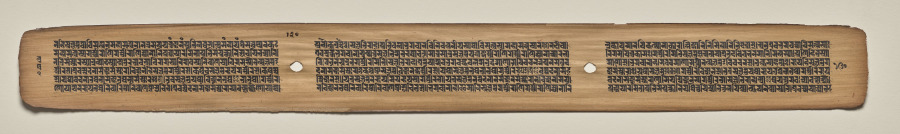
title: Text, Folio 120 (verso), from a Manuscript of the Perfection of Wisdom in Eight Thousand Lines (Ashtasahasrika Prajnaparamita-sutra)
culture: Eastern India, Bihar, Vikramashila Monastery. Painting: Nepal, Kathmandu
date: Sunday, September 14, 1119 (year 239 of the Newar Samvat in the month of Ashvina)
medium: gum tempera and ink on palm leaves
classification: Painting